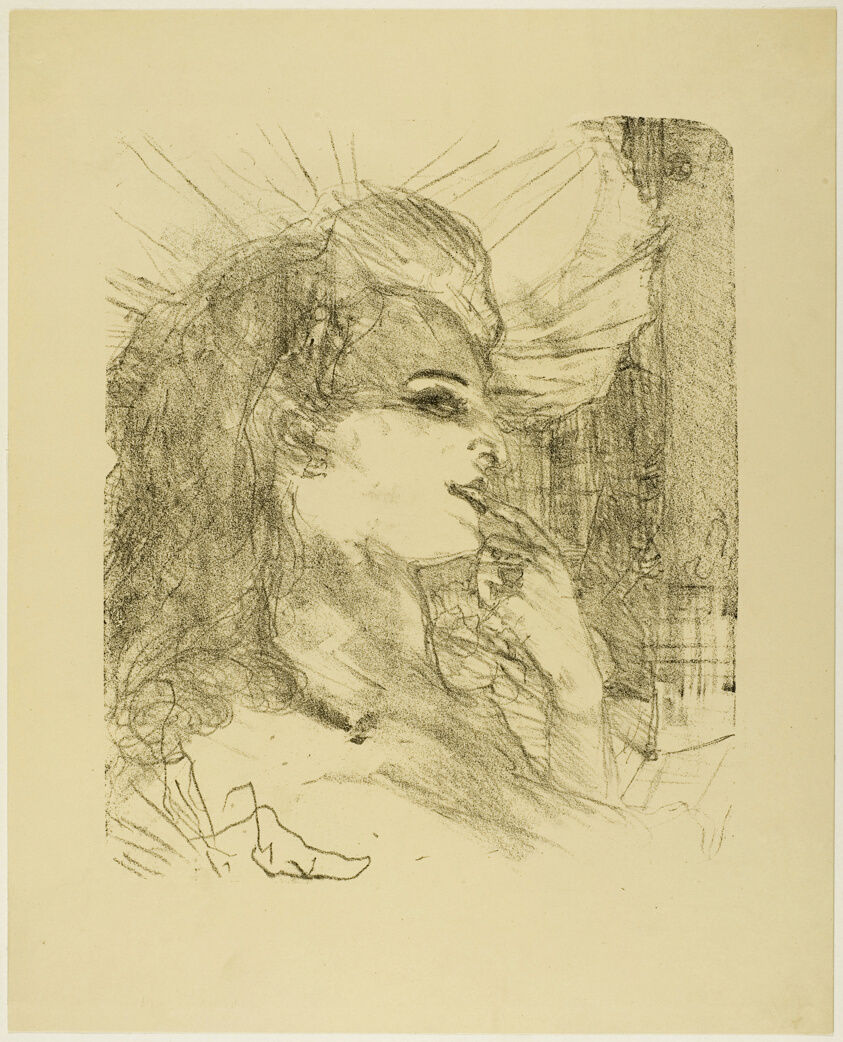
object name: Print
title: Anna Held, from Treize Lithographies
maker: Henri de Toulouse-Lautrec (French, 1864-1901)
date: 1898, published before 1906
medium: Lithograph on cream wove paper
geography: France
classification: lithograph; print; prints and drawing